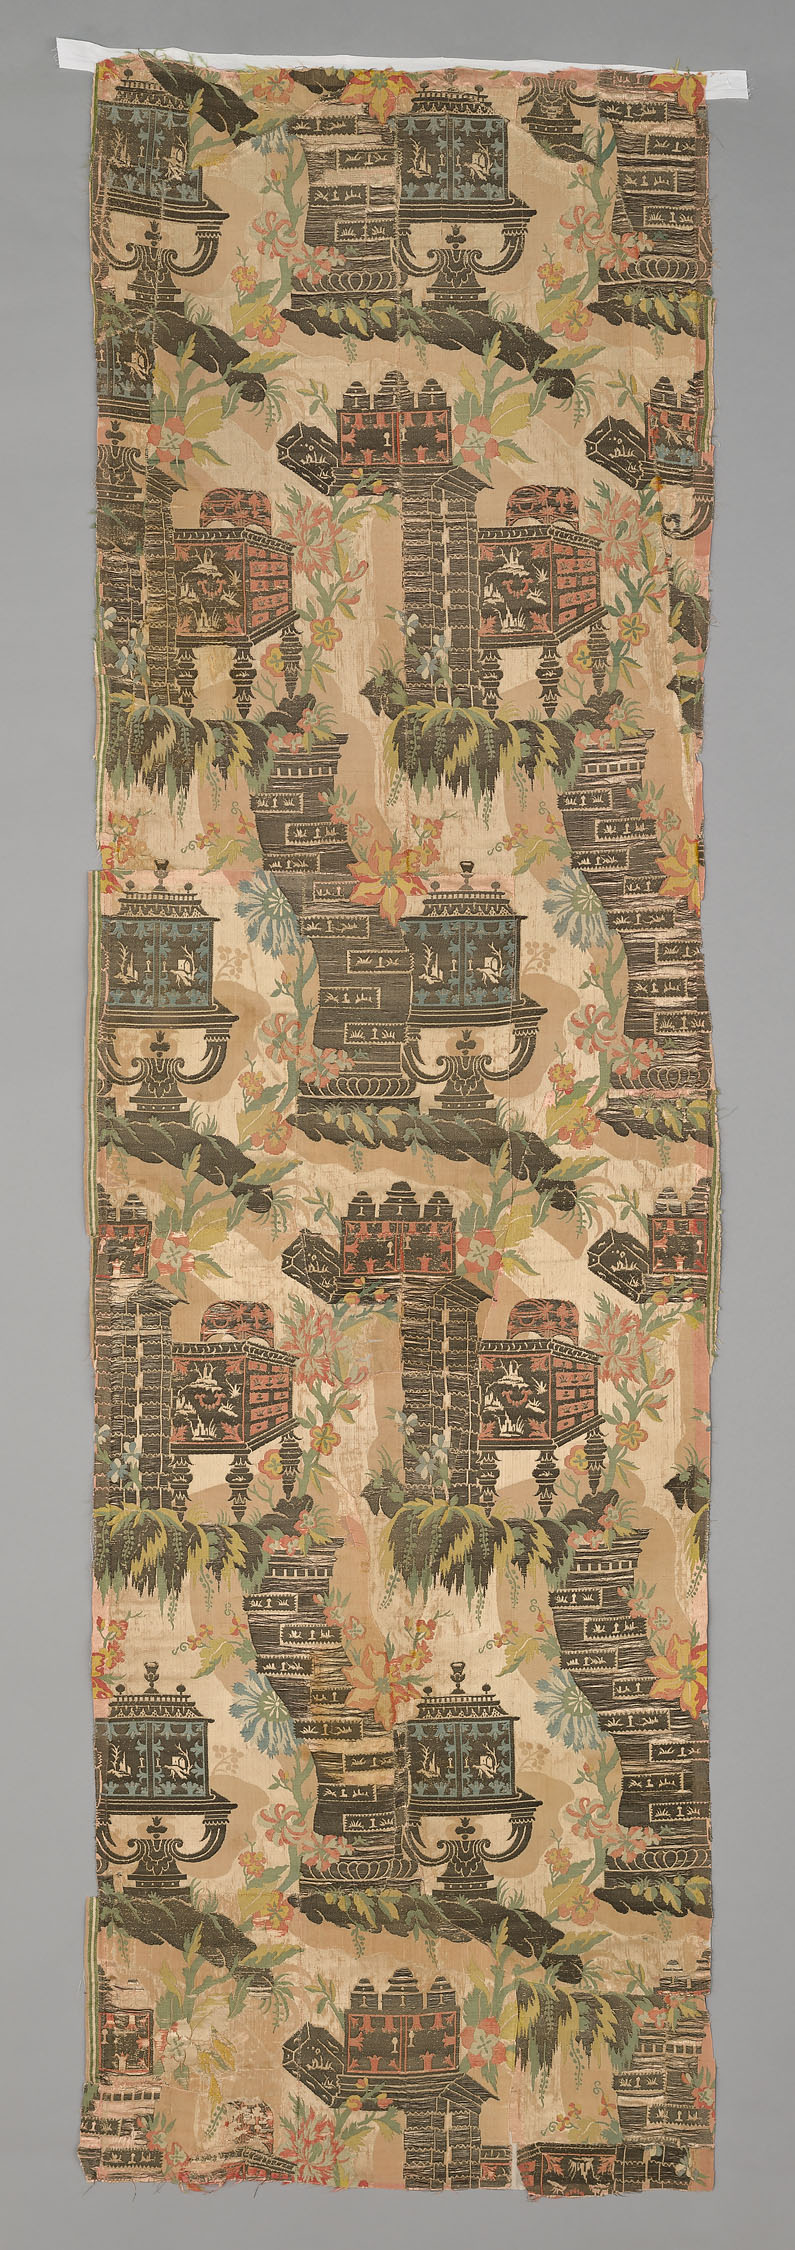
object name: Textile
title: Panel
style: "bizarre" style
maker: France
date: 1707/08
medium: Silk and silvered-metal-strip-wrapped silk, satin weave with twill interlacings of secondary binding warps and brocading and self-patterning ground wefts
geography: France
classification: textile; weaving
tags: Floating Gardens